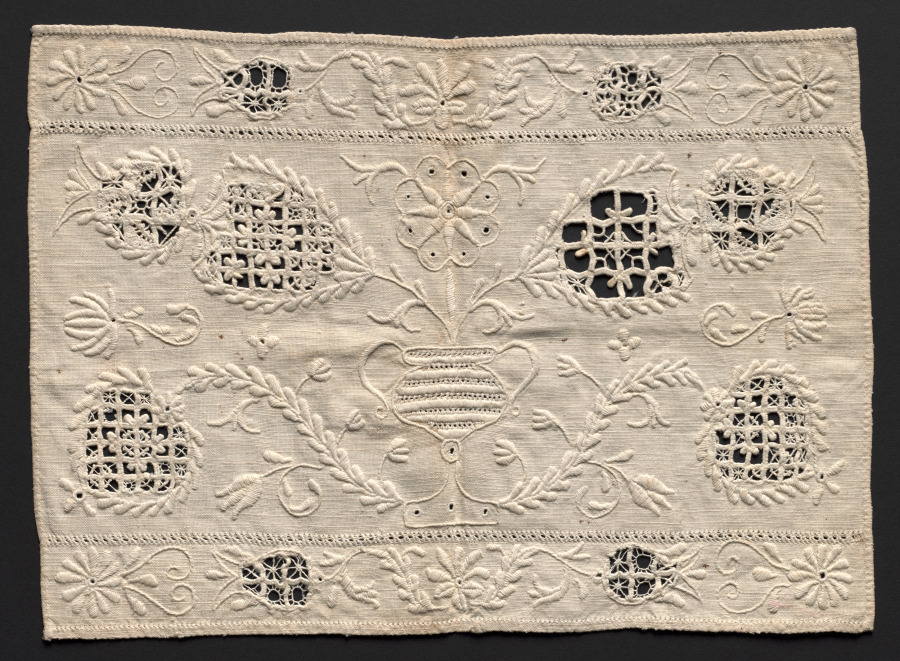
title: Lace and Embroidery Strip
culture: Denmark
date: 1880–99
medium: Plain weave linen: needle lace (cutwork) and embroidery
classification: Embroidery